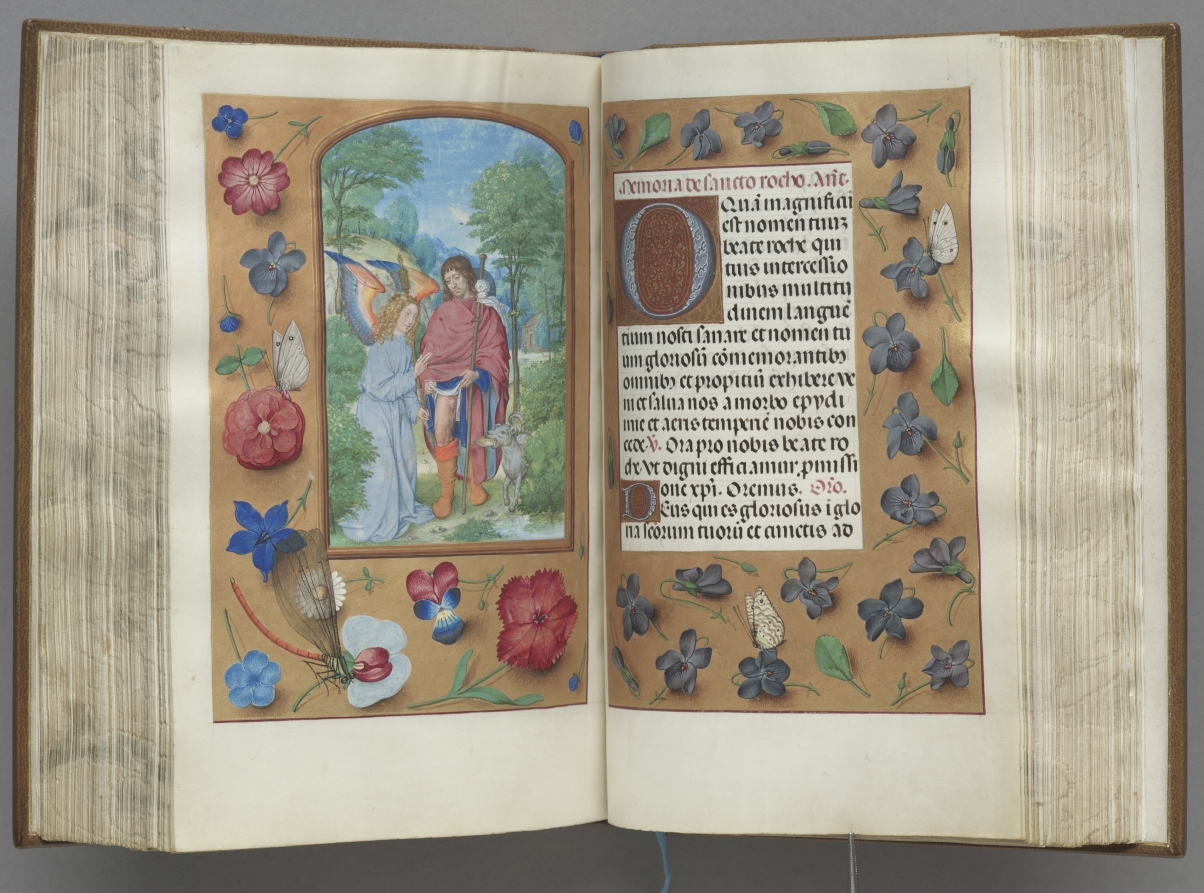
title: Hours of Queen Isabella the Catholic, Queen of Spain: Fol. 181v, St. Roch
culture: Flanders, Ghent and Bruges, late 15th century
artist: Master of the First Prayerbook of Maximillian (Flemish, c. 1444–1519)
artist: and Associates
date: c. 1500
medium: ink, tempera, and gold on vellum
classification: Bound Volume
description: This manuscript was illuminated by a circle of at least five highly organized manuscript painters active in the Flemish cities of Ghent and Bruges. The principal illuminator was Alexander Bening, who painted the majority of the book's miniatures. Manuscripts produced by this circle of artists are renowned for the decoration of their borders, which typically feature a rich variety of realistically-painted flowers, birds, and butterflies. This prayer book, called a book of hours, was intended not for a cleric, but for the private devotions of a lay person-in this case, Isabella the Catholic, Queen of Spain (1451-1504). Isabella's coat of arms embellishes the book's frontispiece. It is unlikely that the book was commissioned by the Queen herself; rather, she probably received it as a diplomatic gift from someone courting her patronage, perhaps Cardinal Francisco Jimenez de Cisneros. A Franciscan friar, Jimenez was dependent upon Isabella for his advancement, first to the post of Queen's confessor in 1492, and then to Archbishop of Toledo in 1495.